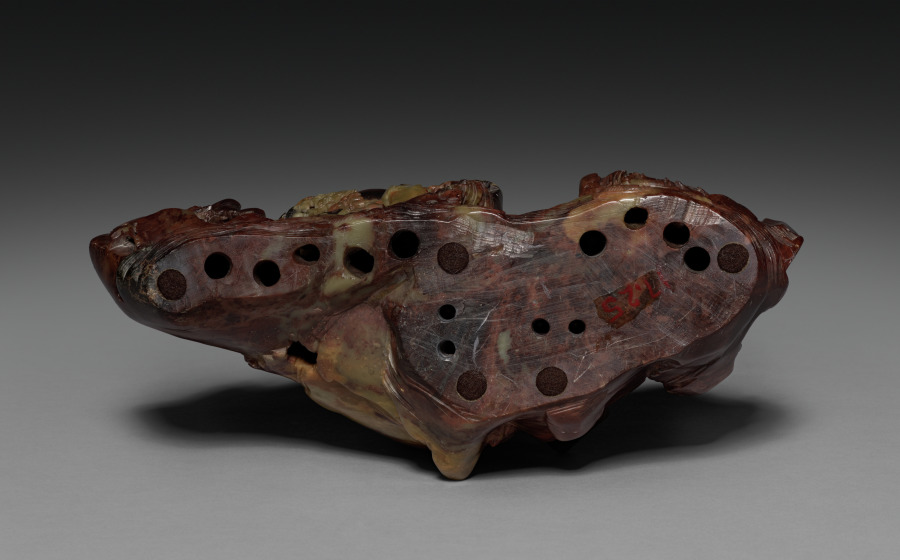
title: Landscape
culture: China, Qing dynasty (1644-1911)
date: 1644–1911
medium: soapstone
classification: Stone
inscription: 石門洞天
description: A mountain scenery surrounded by water and fish is meticulously carved out of soapstone, with a pond, bridge, waterfall, and temple front in its center. The unidentified figure scene on the left includes an ox and a man wearing what appears to be a Korean hat. A Buddha figure hidden in the depth of the temple can be glimpsed from the backside. The inscribed pillar on the right reads “Stonegate Cave to Heaven (shimen dongtian)”. Indentations all over the stone suggest that the miniature mountain was once adorned with precious stones and metal, presumably representing an earthly paradise to which one could escape in one’s mind and imagination.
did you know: A waterfall plummets down the cliff by the temple and then flows smoothly down to join the river at the front of the landscape scene.